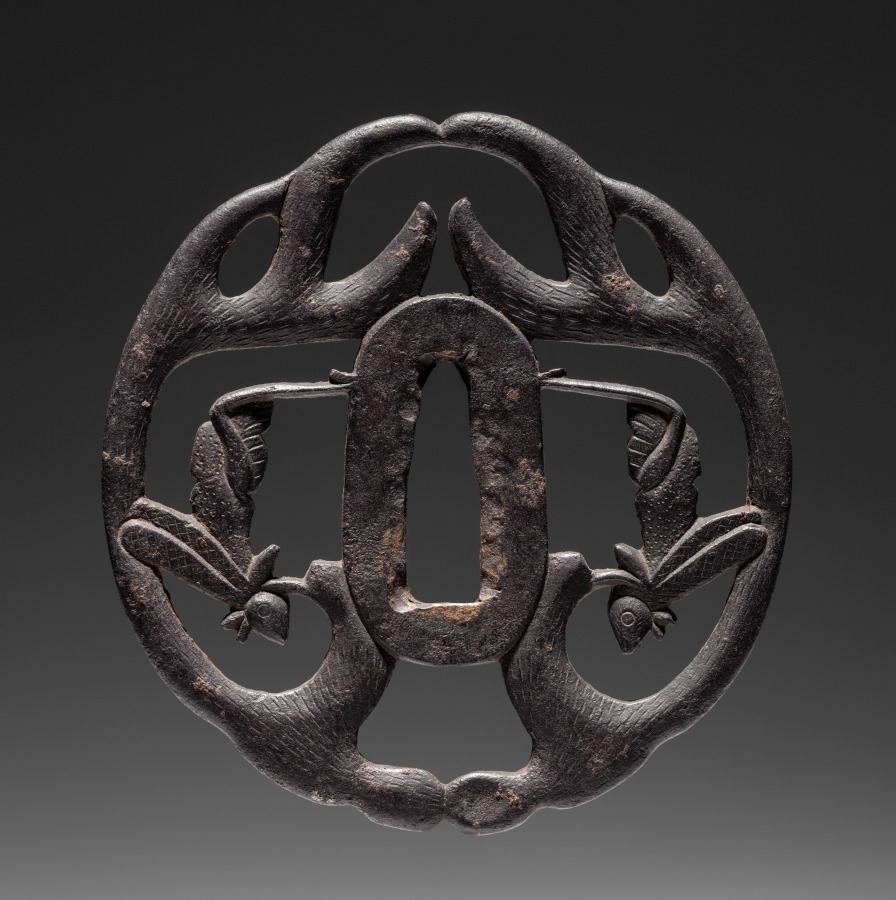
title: Sword Guard (Tsuba)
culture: Japan, possibly Edo period (1615-1868)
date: c. 1615–1868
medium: iron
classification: Arms and Armor